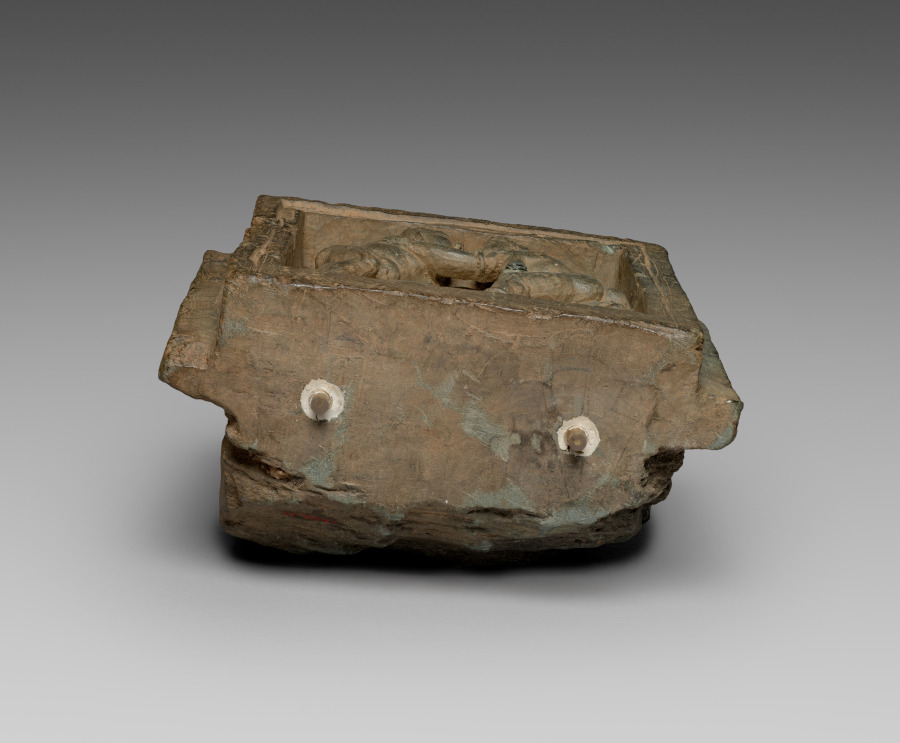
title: Architectural Bracket with Wrestlers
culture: Pakistan, Gandhara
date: 100s–200s CE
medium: schist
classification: Sculpture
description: This sculpture probably derived from Greco-Roman prototypes of nude athletes, but here it has probably been transposed into a scene from the boyhood of the Buddha, when it is said that he excelled in all forms of athletics.